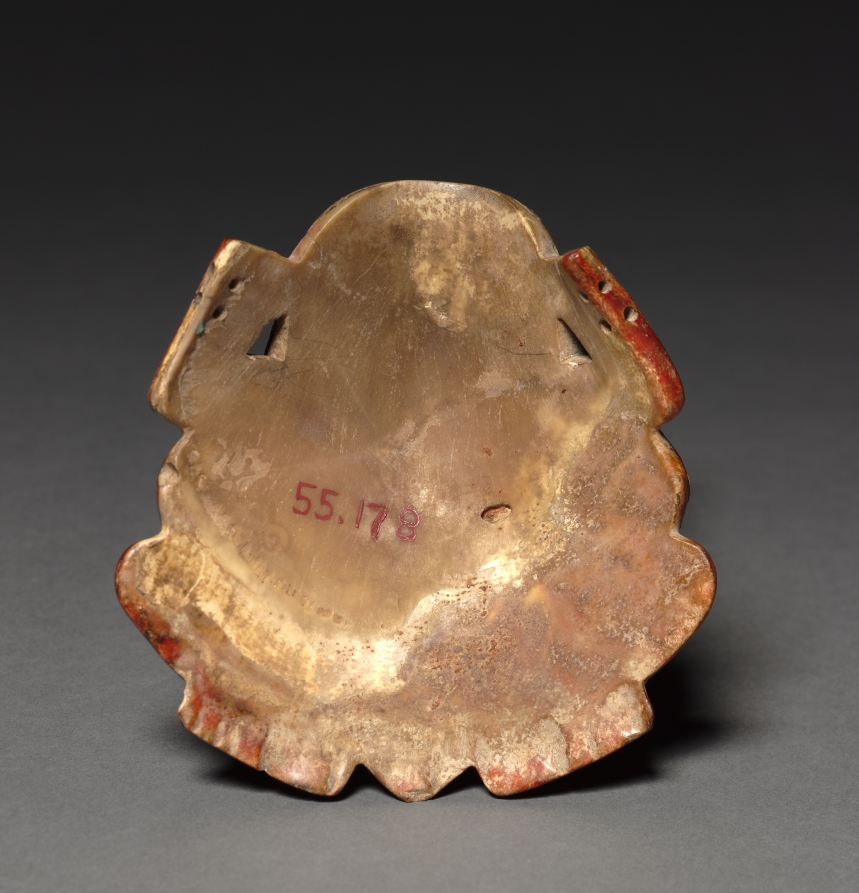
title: Frog Ornament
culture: Peru, Moche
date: 50–800 CE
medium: shell, stone, gold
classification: Jewelry